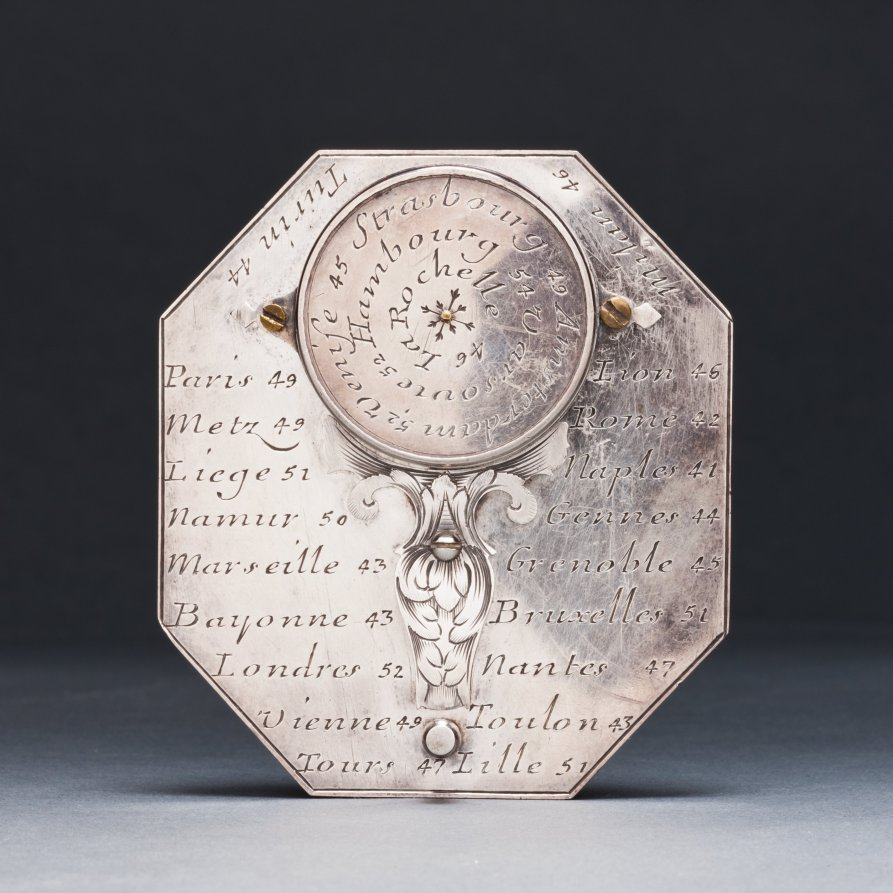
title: Butterfield Sundial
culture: France, 18th century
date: 1700s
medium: silver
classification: Silver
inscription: [Engraved signature above the compass in ribbon band]: "N. BION A Paris"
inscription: [Engraved on the face of the sundial]: “Pour 55° 4-5-6-7-8-9-10-11 50° IIII-V-VI-VII-VIII-IX-X-XI 45° 5-6-7-8-9-10-11 40° -VI-VII-VIII-IX-X-XI'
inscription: [Engraved on the other side]: "Pour 55° -8-7-6-5-4-3-2-1-0 50°-VIII-VII-VI-V-IIII-III-II-I 45°-8-7-6-5-4-3-2-1 40°-VII-VI-V-IIII-III-II-I"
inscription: [Engraved around the compass]: “NORD-OUEST-SUD-EST”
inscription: [Engraved on the back of the sundial]: “Turin 44 Milan 46 Paris 49 Lion 46 Metz 49 Rome 42 Liege 51 Naples 44 Namur 50 Gennes 44 Marseille 43 Grenoble 45 Bayonne 43 Bruxelle 51 Londres 52 Nantes 47 Vienne 48 Toulon 43 Tours 47 Lille 51”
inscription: [Engraved around the back of the compass]: “Venise 45 Strasbourg 49 Amsterdam 52 Hambourg 54 Varsovie 52 La Rochelle 46”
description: Butterfield-type sundials are characterized by their adjustable gnomons, metal flaps that cast a shadow on the dial’s face to indicate the hour, and geographical indices. This sundial has a scale adjustable between latitudes of 40° to 60° north. The latitudes of 26 European towns are engraved on its back for quick reference. With an intricately engraved silver face, it would have functioned as a fashionable traveler’s accessory.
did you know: Butterfield-style sundials were named after Micheal Butterfield, an English scientific and mathematical instrument maker who worked in Paris between 1674 and 1724.